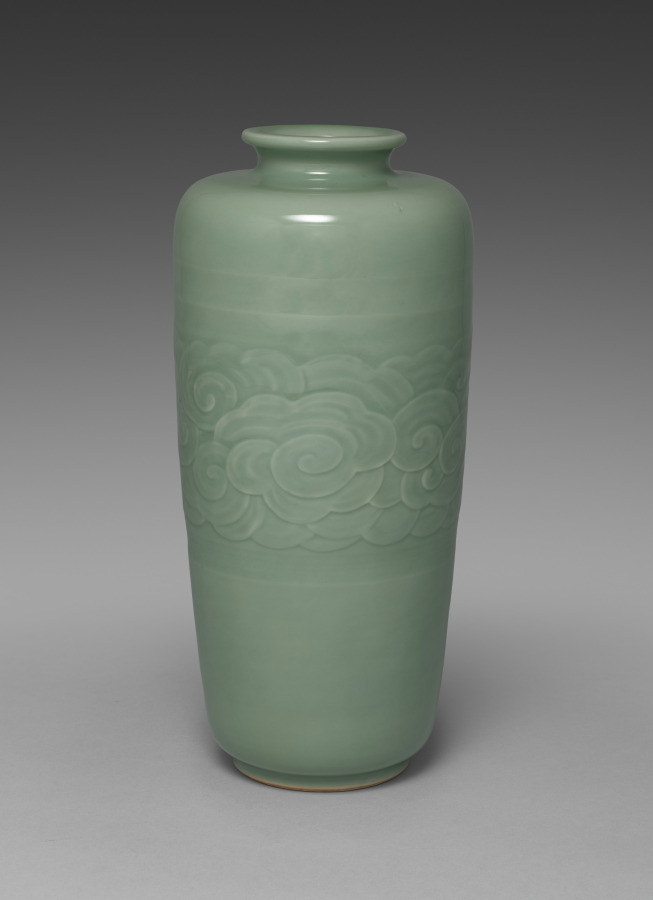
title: Tong-shaped Vase with Band of Cloud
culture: Japan, Meiji period (1868–1912)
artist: Seifū Yohei III (Japanese, 1851–1914)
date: 1893–1914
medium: Porcelain with molded and carved design and green glaze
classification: Ceramic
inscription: 清風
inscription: 帝室技芸員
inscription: 金聲玉振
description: Many of the vases created by Yohei III and IV were made with reference to and in emulation of Chinese ceramics in both form and glazing. The vessel type called tongping, pronounced tōbin in Japanese, is tall and cylindrical, like the thick length of bamboo referenced in the shape of the ideograph tong 筒. Unlike the ancient gu, hu, and guan, this form did not emerge in China until the Ming dynasty, and many such vases date to the early Qing dynasty. Two green-glazed vases, this one by Yohei III and the other by Yohei IV CMA 2022.228, are interpretations of this form. Yohei III’s version has slightly hunched shoulders and is somewhat wider at the top below the small neck and lip. Yohei IV’s vase is more angular. The wide rack of molded cloud encircling the Yohei III vase rises subtly from very low relief banding above and below it, accentuating the vessel’s rounded edges and complementing the form. In contrast, the allover flower vine pattern on the body and “seven treasures” pattern at the collar of the vase by Yohei IV evokes a garment’s cuffed sleeve, like the common English appellation for this type of vessel—“sleeve vase.”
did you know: Seifū Yohei III mined the repertoire of Chinese vessel types, from ceramics modeled after ancient ritual bronzes to shapes developed in the Yuan (1279–1368) and Ming (1368–1644) dynasties.